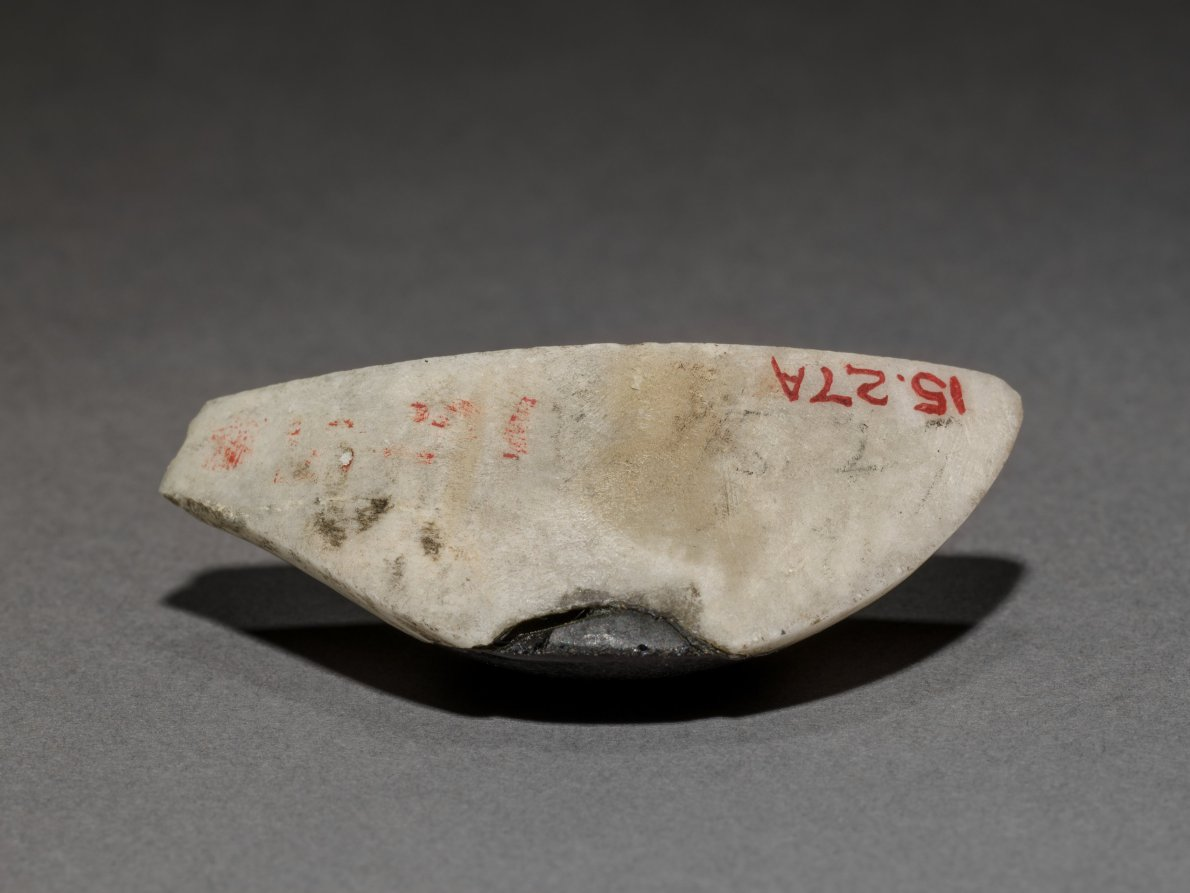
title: Inlay Eye (one of a pair)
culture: Egypt, Haraga, cemetery E, tomb 614, excavated in 1914, Middle Kingdom (2040–1648 BCE), Dynasty 12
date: 1980–1801 BCE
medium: travertine and obsidian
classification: Funerary Equipment